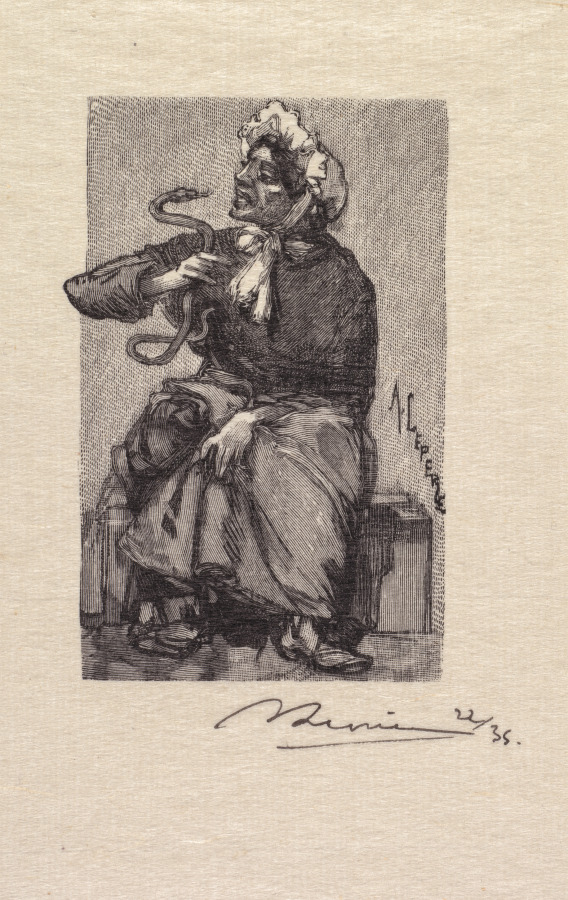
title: Fontainebleau Forest: Serpent Merchant (La Forêt de Fontainebleau: Marchande de Serpents)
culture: France, 19th century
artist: Auguste Louis Lepère (French, 1849–1918)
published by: A. Desmoulins, Published in Revue Illustrée, 1887–90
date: 1890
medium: wood engraving from bound volume of 34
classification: Bound Volume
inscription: On block, right center: A LEPERE; below image, lower right, in black ink: ALepère 22/35; on window mat, lower right, in graphite: Marchande de Serpents